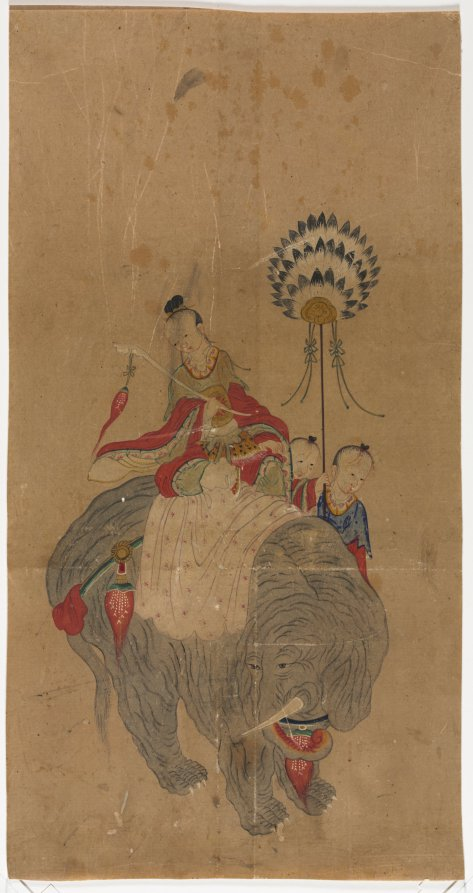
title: Samantabhadra on an Elephant with Two Attendants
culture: Korea, Joseon dynasty (1392–1910)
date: 1392–1910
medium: Ink and color on paper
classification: Painting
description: By the late 18th century, subjects that deal with Daoist immortals and their fantasy stories were increasingly chosen for paintings. For their wish-granting message, Daoist figure paintings such as this one were often commissioned to celebrate festive occasions. Judging from its dimension, this paining may have been part of either a small-size multi-panel folding screen or a large-size album that depicts a series of Daoist immortals and Buddhist deities.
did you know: The oval face with the pointy chin and wide forehead is a typical depiction of women in 19th-century paintings like this one.